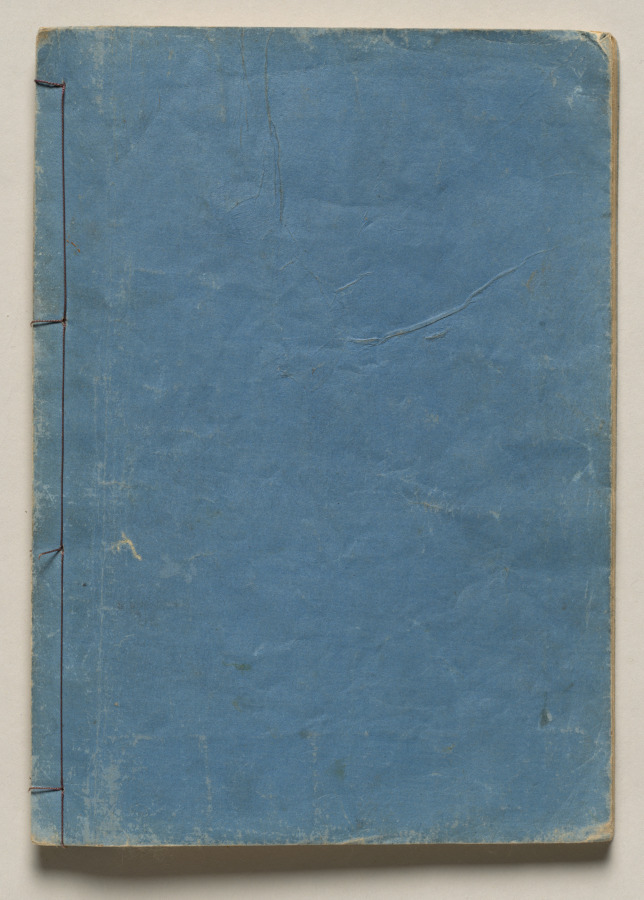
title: Volume Three of People of Japan in Light Verse (Kyōka)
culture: Japan, Edo period (1615–1868)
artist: Utagawa Hiroshige (Japanese, 1797–1858)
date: 1857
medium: Woodblock-printed book; ink and color on paper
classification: Bound Volume